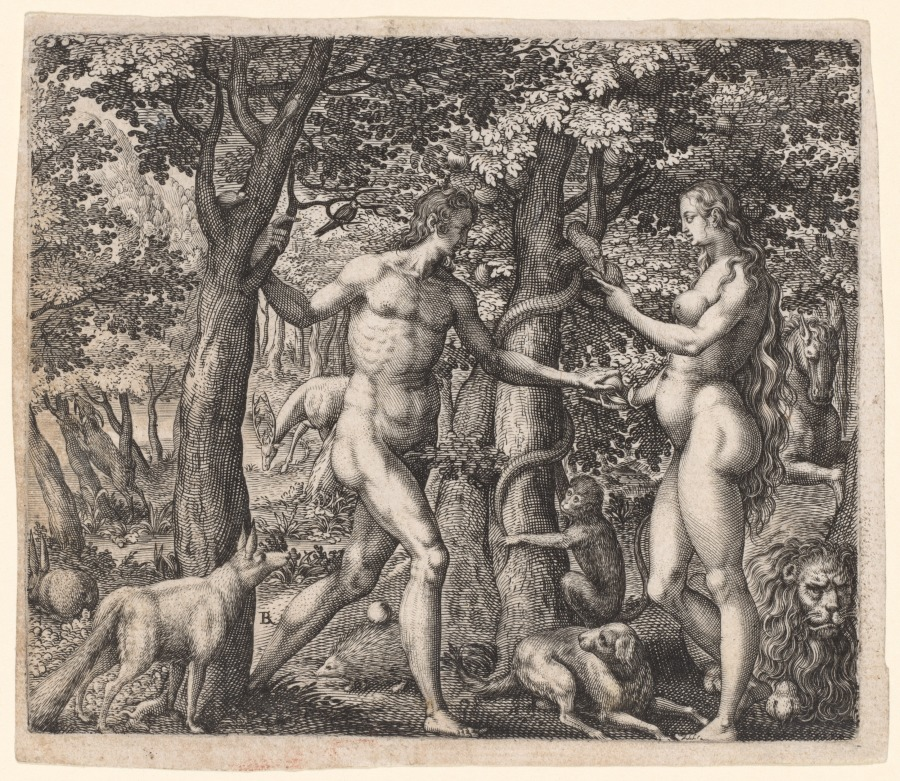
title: Adam and Eve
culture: France, 16th century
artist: Robert Boissard (French, 1570–after 1603)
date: late 1500s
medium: engraving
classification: Print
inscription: lower left, in plate: RB[in monogram]